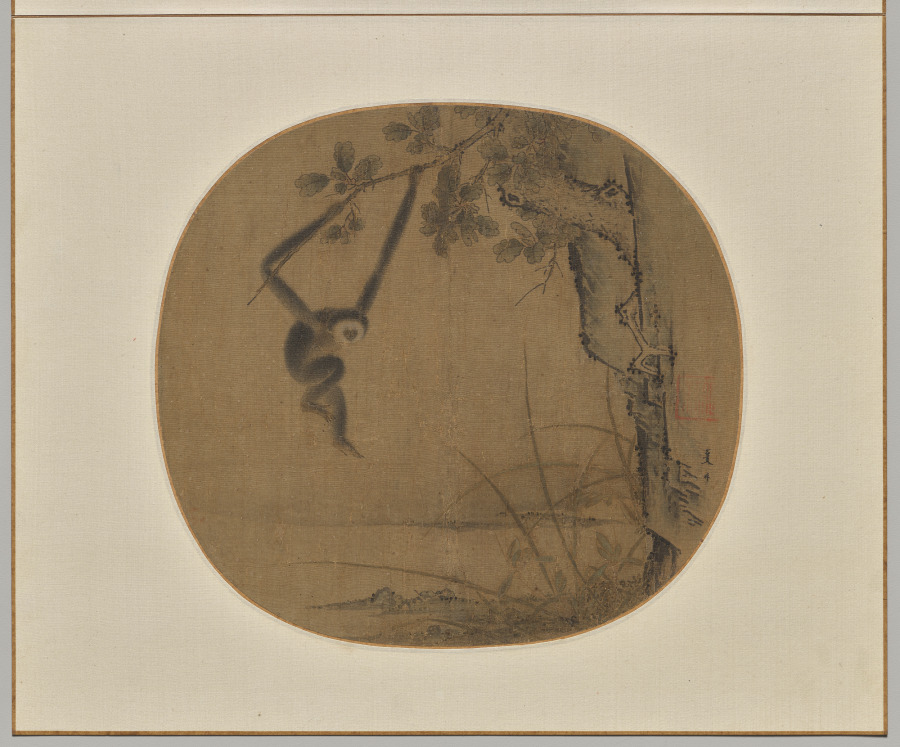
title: Swinging Gibbon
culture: China, Southern Song dynasty (1127-1279)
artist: attributed to Xia Gui (Chinese, active c. 1209–c. 1243)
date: late 1100s–early 1200s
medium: Album leaf; ink and color on silk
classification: Painting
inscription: Artist's signature: Hsia ? .